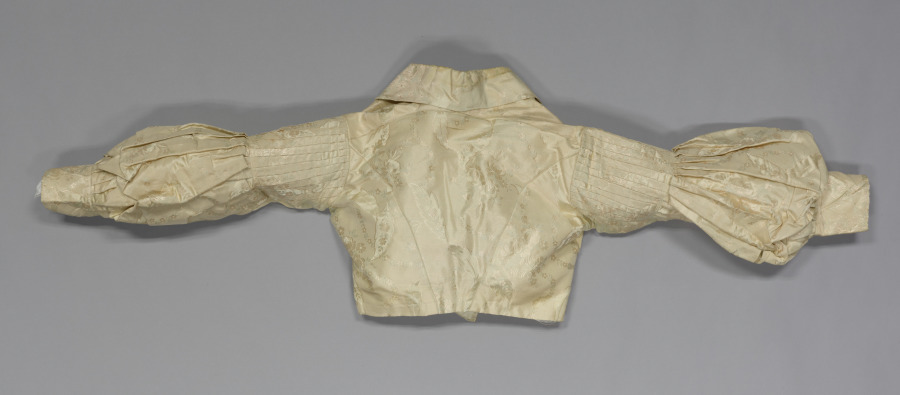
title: Woman's Costume (Jacket)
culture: Italy, Sicily, 19th century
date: 1800s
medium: silk (white) damask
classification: Garment